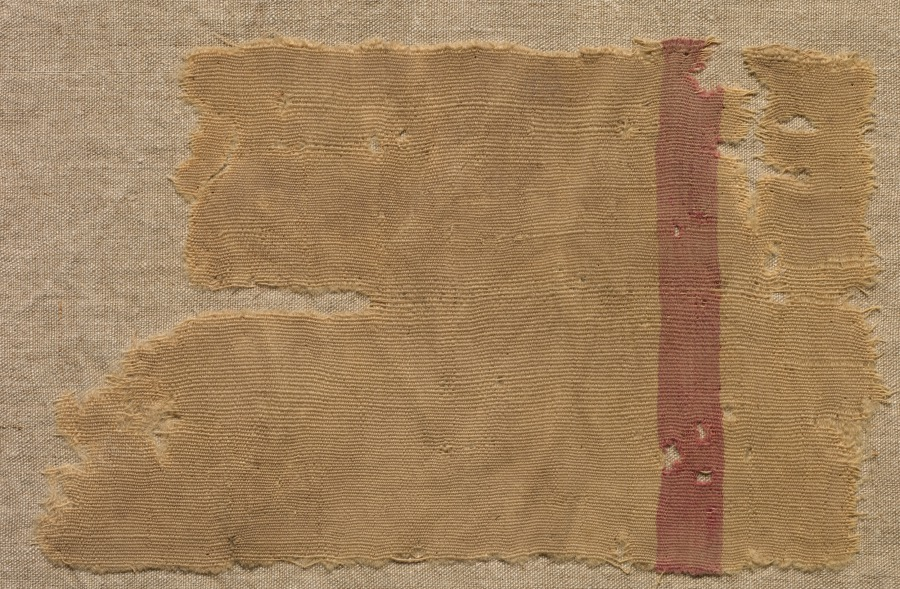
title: Wool Tapestry Fragment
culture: Syria, Dura-Europos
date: 200s CE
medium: wool: tapestry weave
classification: Tapestry